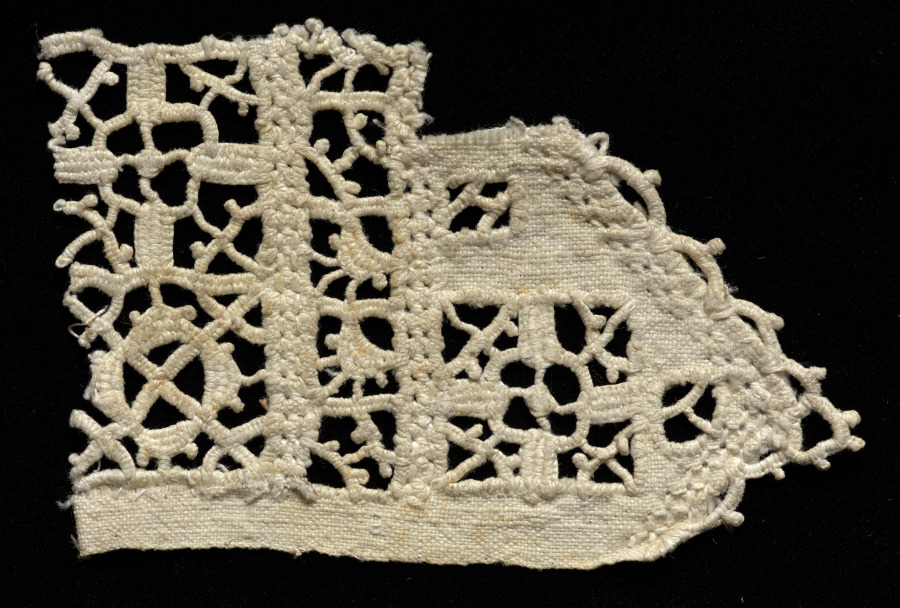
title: Lace Fragment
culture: Italy, 1800s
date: 1800s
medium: Linen: needle lace (cutwork)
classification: Lace